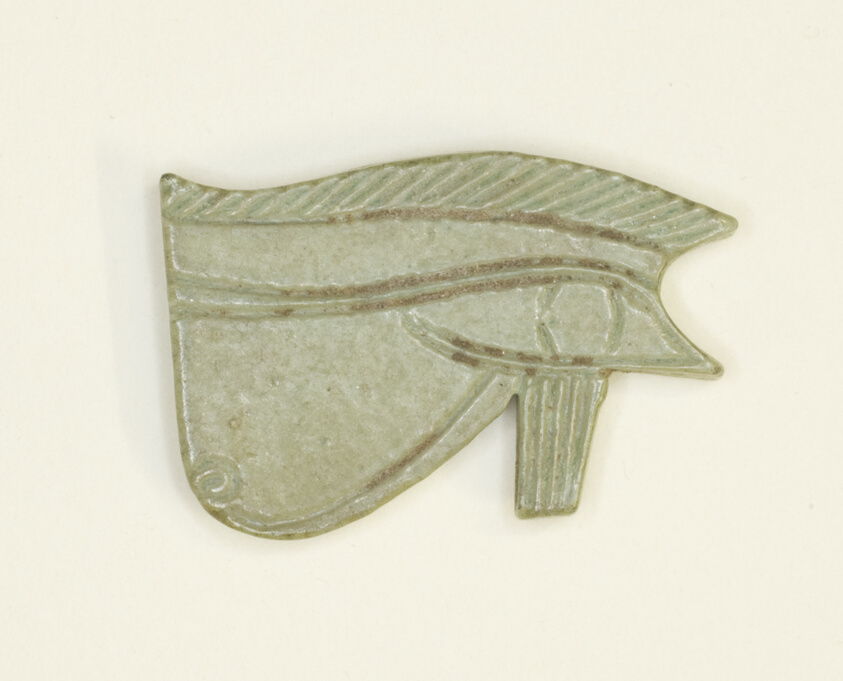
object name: Costume and Accessories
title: Eye of Horus (Wedjat) Amulet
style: third intermediate period, ancient, egyptian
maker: Egyptian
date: Third Intermediate Period, Dynasty 21–25 (about 1069-664 BCE)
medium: Faience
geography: Egypt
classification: amulet; ceramics; jewelry; ancient art; costume; faïence (composite material)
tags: eye of Horus